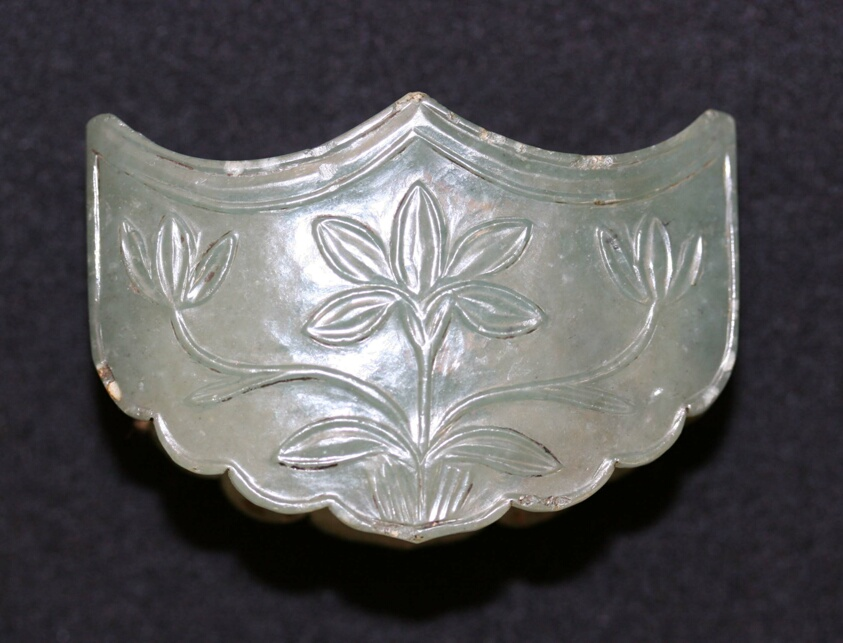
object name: Decorative Arts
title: Sword Guard with Floral Design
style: South Asian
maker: India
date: 18th century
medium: Jade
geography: India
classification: jade; asian art; decorative arts